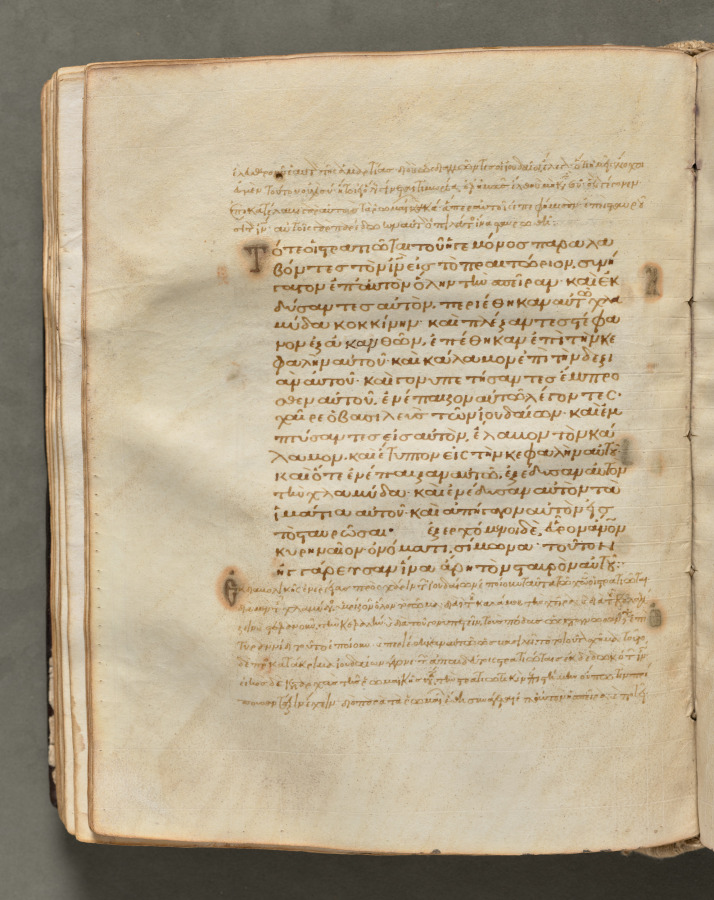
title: Text, folio 124 (verso), from a Gospel Book with Commentaries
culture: Byzantium, Constantinople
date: c. 1000–1100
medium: ink, tempera, and gold on vellum; leather binding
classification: Bound Volume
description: Each of the four gospels in this book opens on a page with brilliantly illuminated borders depicting the author of the text as well as birds-principally peacocks, symbols of the immortality of the soul-and fountains, representing the fountain of life and the salvation of the soul. This volume consists of 428 leaves with texts in Greek. Its level of sophistication suggests that it was probably written and decorated in a monastery in Constantinople.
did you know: Gospel Books were carried in procession through Byzantine churches.